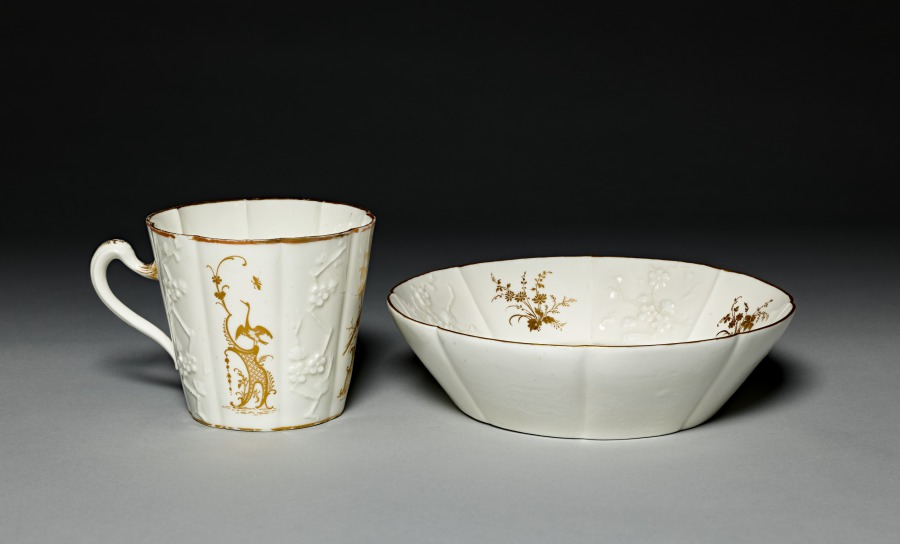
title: Cup and Saucer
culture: France, Vincennes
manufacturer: Vincennes Porcelain Factory (France, 1740–56)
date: c. 1750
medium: soft-paste porcelain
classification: Ceramic